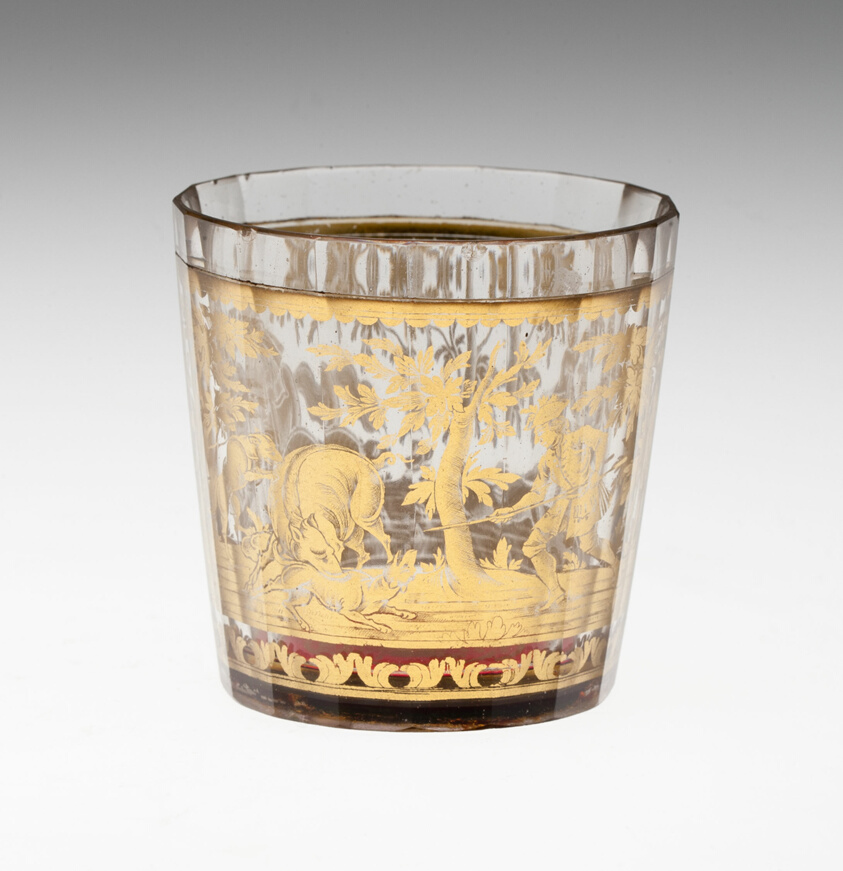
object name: Glass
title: Beaker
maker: Bohemia, Czech Republic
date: Early 18th century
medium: Glass with engraved gold leaf decoration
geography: Bohemia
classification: drinking vessel; glass; european decorative arts